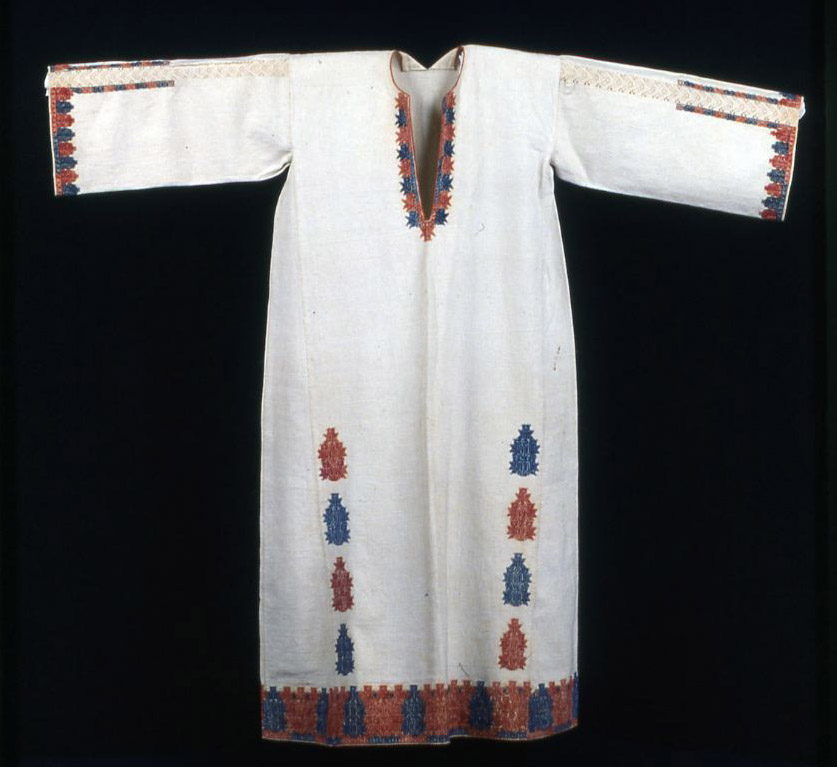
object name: Costume and Accessories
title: Woman's Dress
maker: Greece, Attica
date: 1700/1900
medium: Cotton, plain weave; embroidered with cotton in back and double running stitches; insets of cotton, needle lace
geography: Attica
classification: textile; needlework - costume; needlework (visual works); costume; dress (garment); clothing